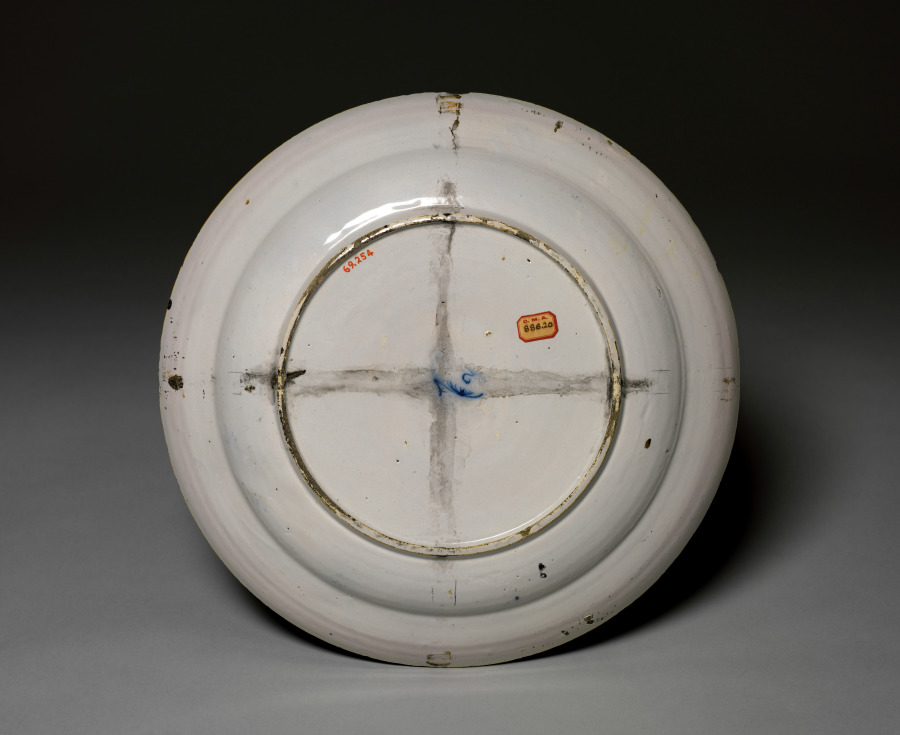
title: Plate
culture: Netherlands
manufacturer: probably by De Porceleyne Claeuw Factory (Dutch)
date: 1700s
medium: Delft ware (tin glazed earthenware)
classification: Ceramic